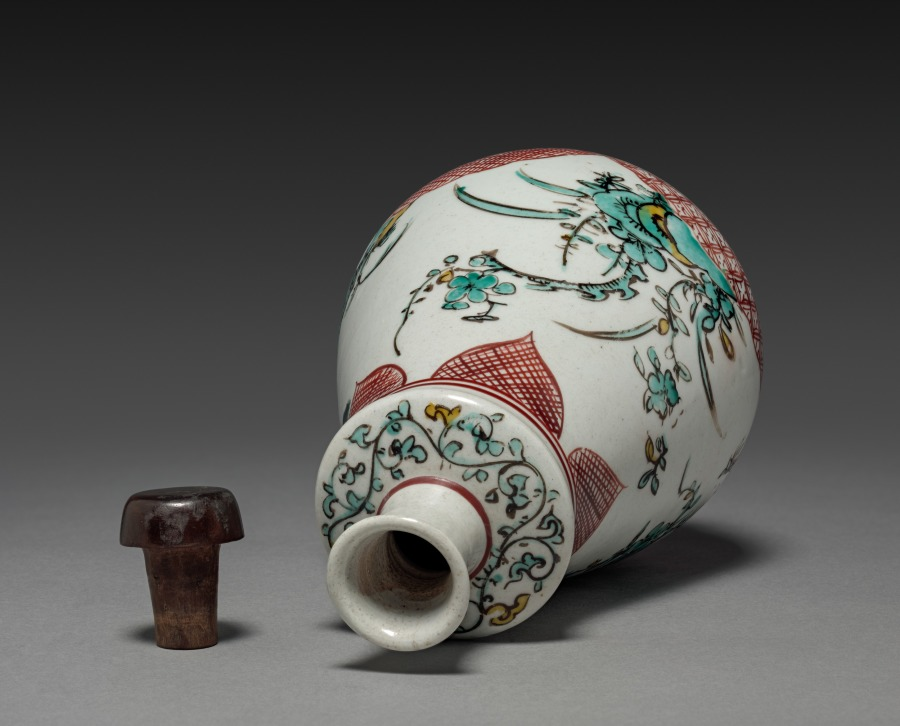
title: Wine Bottle with Plum and Pine Tree Design: Ko Imari Type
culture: Japan, Edo period (1615–1868)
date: late 1600s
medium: porcelain with underglaze enamel decoration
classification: Ceramic